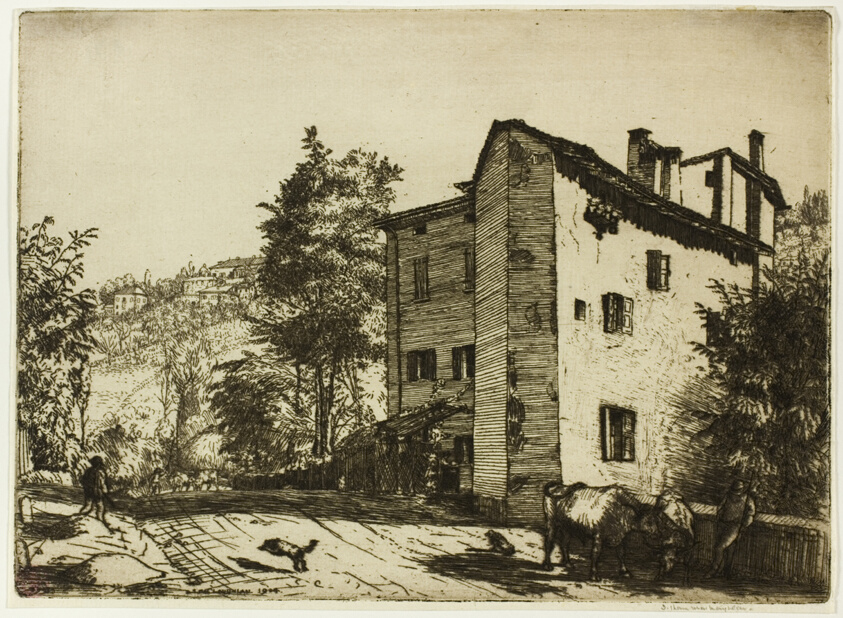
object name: Print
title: Meloncello, Italy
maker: Donald Shaw MacLaughlan (American, born Canada, 1876-1938)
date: 1904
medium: Etching in black on cream laid paper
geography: United States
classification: etching; print; prints and drawing